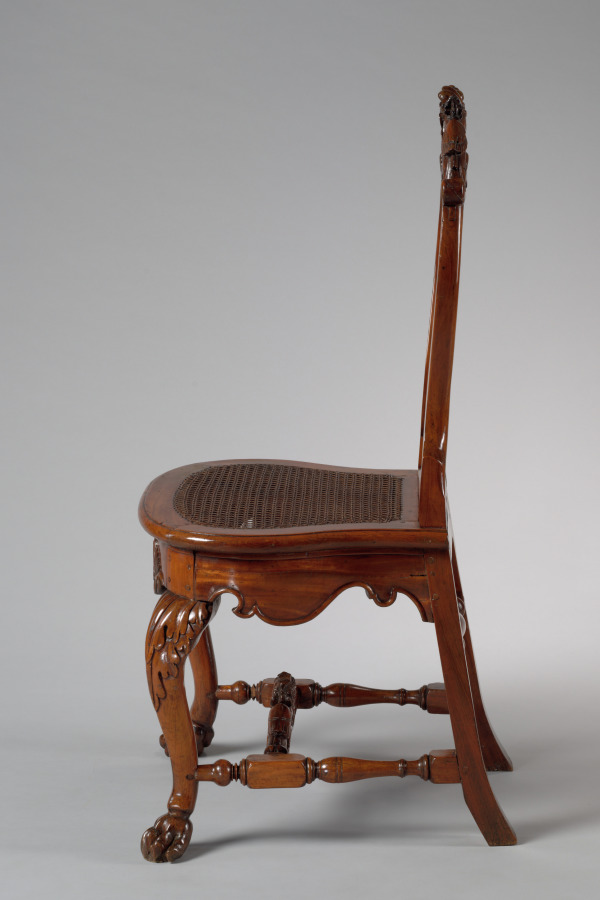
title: Side Chair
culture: Netherlands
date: 1705–15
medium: tulipwood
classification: Furniture and woodwork